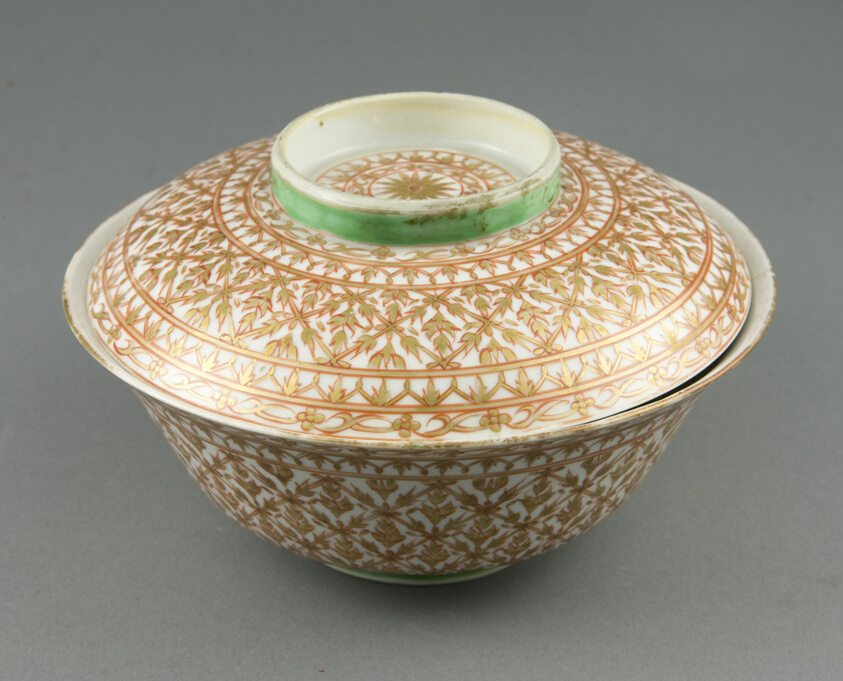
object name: Decorative Arts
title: Lai Nam Thong (Gold-Washed) Ware, Covered Bowl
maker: China, for the Thai Market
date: 19th century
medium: Porcelain painted with gilt in overglaze polychrome enamels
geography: China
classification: porcelain; asian art; ceramics; decorative arts